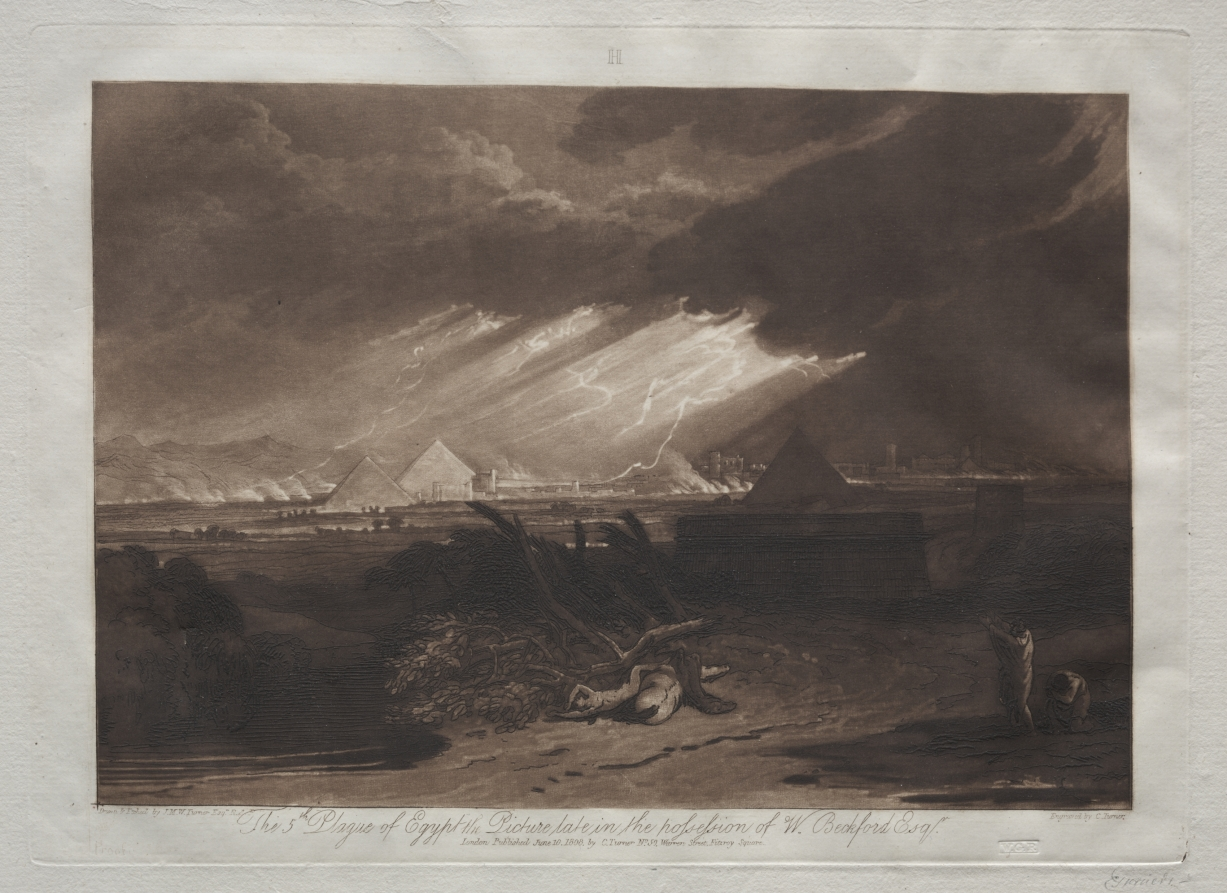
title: Liber Studiorum: The Fifth Plague of Egypt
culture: England, 19th century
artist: Joseph Mallord William Turner (British, 1775–1851)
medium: etching and mezzotint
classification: Print